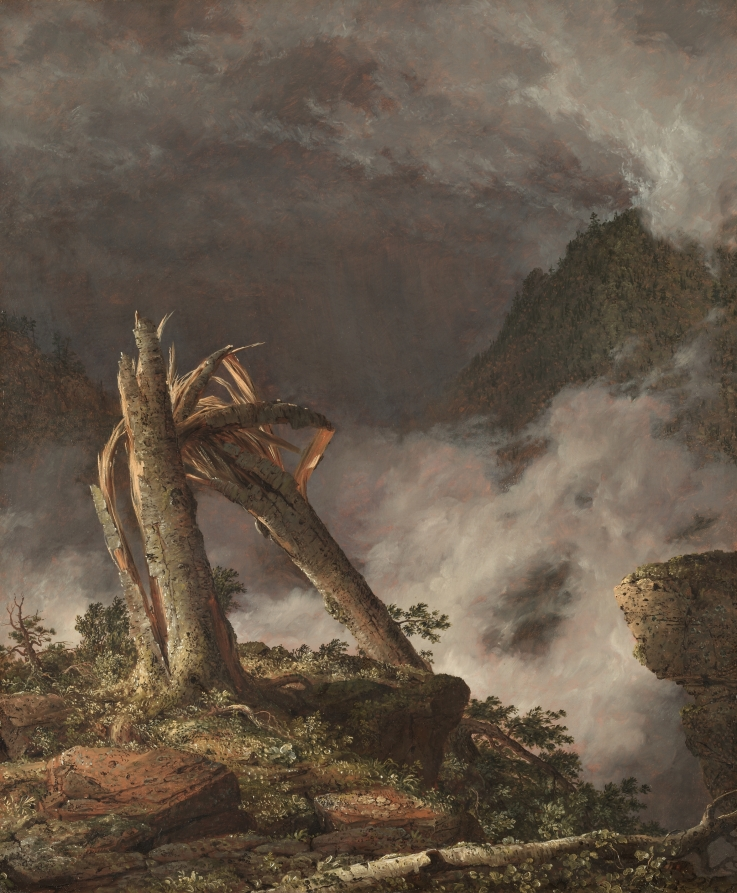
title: Storm in the Mountains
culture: America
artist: Frederic Edwin Church (American, 1826–1900)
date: 1847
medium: oil on canvas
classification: Painting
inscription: Signed in center on tree: "F. CHURCH. 1847"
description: Dominating this composition is a lightning-blasted tree embodying nature's awe-inspiring power and endless cycle of life and death. A popular motif because of these associations, the blasted tree was favored by many landscape painters like Church, who prominently featured it here.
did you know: Church's spectacular home and studio, named Olana, is preserved as a New York State Historical Site.